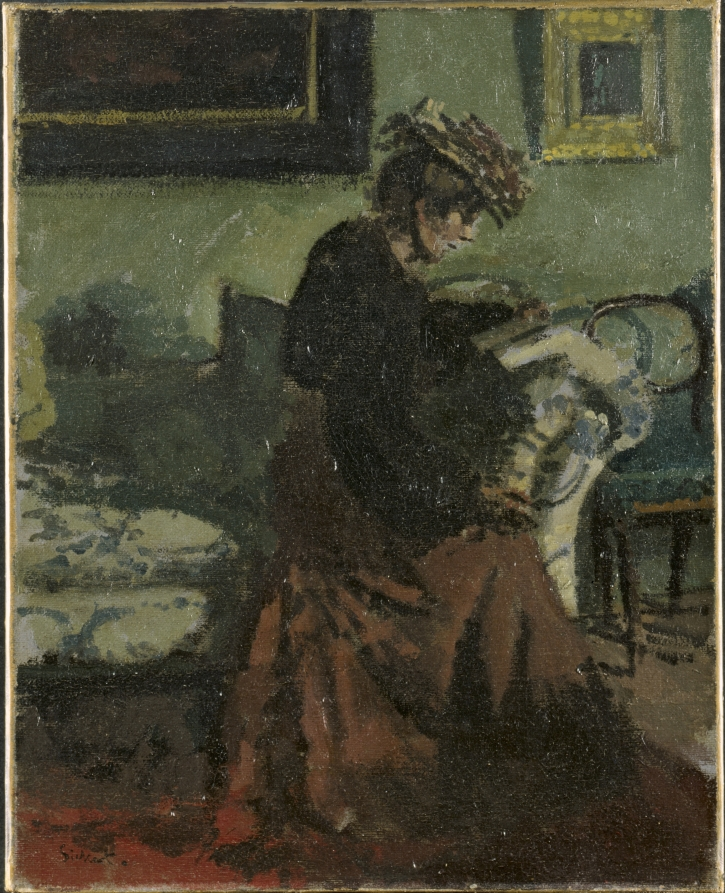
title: Easter Monday-Hélène Daurmont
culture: England, 20th century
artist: Walter Sickert (British, 1860–1942)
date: 1906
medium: oil on canvas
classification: Painting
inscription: Signed lower left: "Sickert"